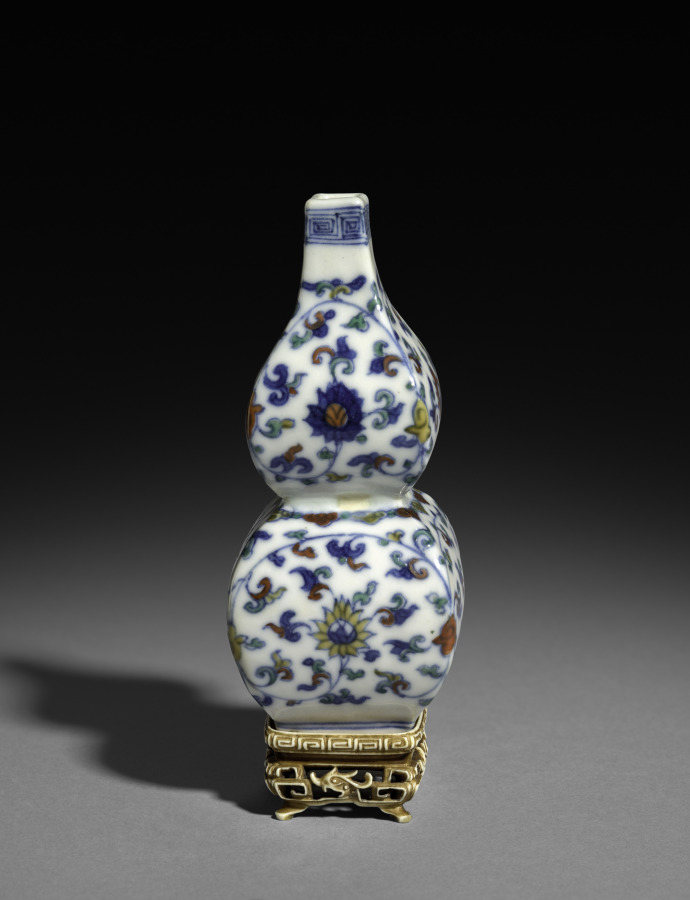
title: Square Double-Gourd Vase with Floral Scrolls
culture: China, Jiangxi Province, Jingdezhen kilns, Ming dynasty (1368–1644), Jiajing mark and reign (1522–66)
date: 1522–66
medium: porcelain with underglaze blue decoration and overglaze enamel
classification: Ceramic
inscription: 大明嘉靖年製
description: In the Ming dynasty (1368–1644), luxury items became more affordable to larger parts of the society, including women, merchants, and literati in non-official positions. Imperial patronage and a growing urban population encouraged consumption of luxury goods and local craftmanship.